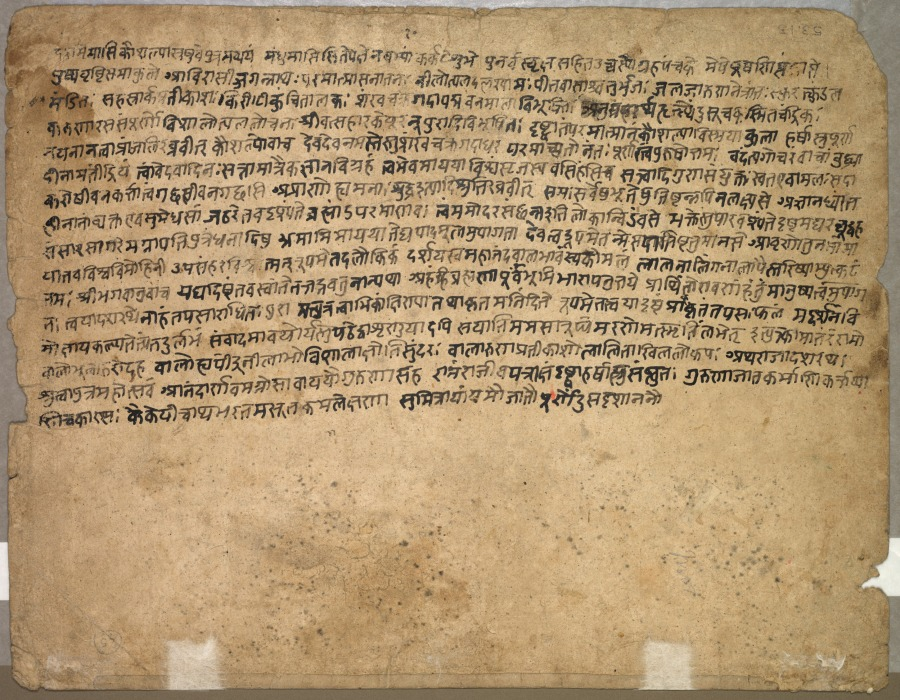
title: The birth of Rama and his brothers, from Chapter 17 of the Bala Kanda (Book of Childhood) of the Adhyatma Ramayana (Rama's Journey of the Supreme Spirit) from the Brahmanda Purana (Ancient Scripture of the Cosmic Egg)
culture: Northern India, Pahari Region, Himachal Pradesh, Rajput Kingdom of Kangra, Court of Aniruddh Chand (reigned 1823–33)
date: c. 1820–30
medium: Gum tempera, ink, and gold on paper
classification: Painting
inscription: [[verso, in Sanskrit]] aśame māsi kausalyā suṣuve putramadbhutam madhumāse site pakśe navamyāṁ karkaṭe śubhe punarvakhṛkśasahite uccasye grahapañcake meṣaṁ pūṣaṇī saṁprāpte puṣpavṛṣtisamākule āvirāsījjagannathaḥ paramātmā sanātanaḥ nīlotpaladalaśyāmaḥ pītavāsaścaturbhujaḥ jalajāruṇanetrantaḥ sphuratkuṇḍalamaṇḍitaḥ sahastrārkapratīkāśaḥ kirīṭī kuñcitālakaḥ śaṅkhacakragadāpadyavanamālāvirājitaḥ anugrahākhyahṛtsthendusūcakasmitacandrikaḥ karuṇārasasampūrṇavishālotpalalocanaḥ śrīvatsahārakeyūranū purādivibhūṣaṇa. dṛṣṭvā taṁ paramātmānaṁ kausalyā vikhayākulā harṣaśrupūrṇanayanā natvā prāñjalirabravīt kausalyovāca devadeva namastestu śṁkhacakragadādhara parmātmācyutonantaḥ pūrṇastvaṁ puruṣottamaḥ vadantyagocaraṁ vācāṁ buddhathādīnāmatīndriyam tvāṁ vedavādinaḥ sattamātraṁ jnanaikavigraham svameva māyayā viśvaṁ sṛjasvavasi haṁsi ca sattvadiguṇasaṁyuktasturya evāmalaḥ sadā karoviva na kartā svaṁ gacchasīva na gacchasi śṛṇoṣi na śṛṇovīva paśyasīva na paśyasi agrāṇo śmanāḥ suddha ityādi śrutirabravīt samaḥ sarveṣu bhūteṣu tiṣṭhaapi na lakśyase ajnānadhvāntacitānāṁ vyakta eva sumedhasām jaṭhare tava dṛśṁyante brahmāṇḍāḥ paramāṇavaḥ tvaṁ mamodarasambhūta iti lokānviḍambase bhakteṣu pāravaśyaṁ te dṛṣṭaṁ megha raghūttama saṁsārasāgare magnā patiputradhanādiṣu bhramāmi māyayā tegha pādamūlamupāgatā deva tvadrūpametanme sadā tiṣṭhatu mānase āvṛṇotu na māṅ māyā tava viśvavimohinī upasaṁhara viśvāsma ado rūpamalaukikam darśayasva mahānandabālabhāvaṁ sukomalam lalitāliṁganālāpaistariṣyāmyutkataṁ tamaḥ śrībhagavānuvāca yadyadiṣṭhaṁ tavāstyamba tattadravatu nānyatha ahaṁ tu brahmaṇā pūrvaṃ bhūmerbhārāpanuttye prārthito rāvaṇaṃ mānuṣatvamupāgataḥ svayā daśarathenāhaṁ tapasārādhitaḥ purā matputratvābhikāḍikśaṇyā tathā kṛtamanindite rūpametatvayā dṛṣṭaṃ prāttanaṃ tapasaḥ phalam maddarshanaṃ vimokśāya kalpate hmanyadurlabhaṁ saṁvādamāvayoryastu paṭheddhā ṣṛṇuyādapi sa yāti mama sārūpyaṁ maraṇe matsmṛtiṃ labhet ityuktvā mātaraṁ rāmo bālo bhūtvā ruroda ha bālatvepīndranīlābho viśālakśotisundaraḥ bālāruṇapratīkāśo lālitākhilalokapaḥ atha rājā daśarathaḥ śrutvā putrodbhavotsavam ānandārṇavamagnpsāvāyayau guruṇa saha rāmaṁ rājīvapatrākśaṁ dṛṣtvā harṣaśrusaṁplutaḥ guruṇa jātakarmāṇi kartavyāni cakāra saḥ kaikeyī cātha bharatamasūta kamalekśaṇa sumitrāyāṁ yayau jātau purṇendusadṛśānanau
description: In a retelling of the Ramayana from the 1200s, the blue god Vishnu appears in a vision to Queen Kaushalya just before she gives birth to his incarnation as Rama. In the foreground, her co-wife Queen Sumitra nurses one of her own newborn twins, Lakshmana and Shatrughna. Rama’s half-brother Bharata lies swaddled next to his mother Queen Kaikeyi on an adjacent terrace of the women’s quarters. The patterned carvings and textiles of the palace interior communicate the luxury into which the princes were born, and from which Rama and Lakshmana will be eventually exiled.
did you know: King Dasharatha thought his wife Kaikeyi, shown sleeping, was the most beautiful of his three wives.